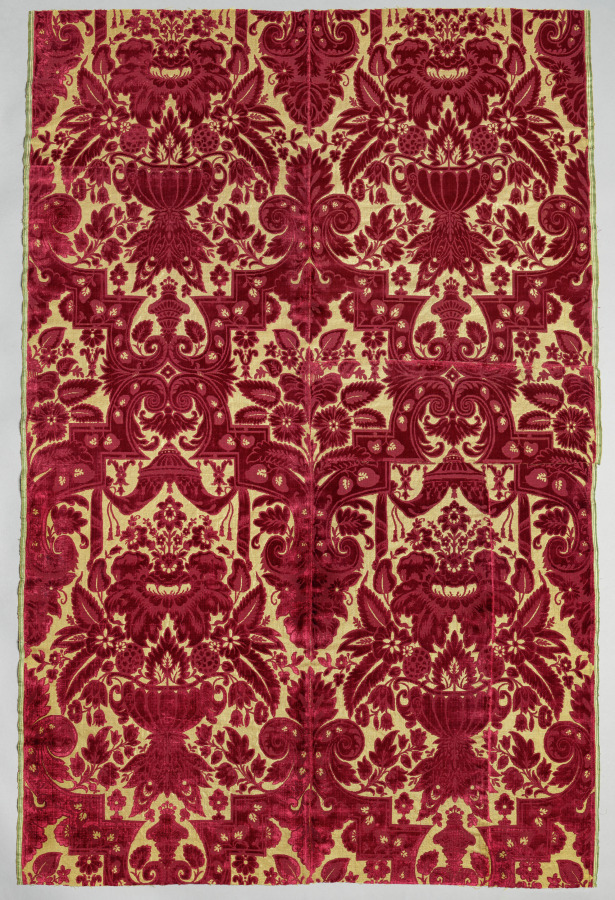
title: Velvet Fragment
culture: Italy, Genoa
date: 1600s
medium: velvet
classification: Velvet